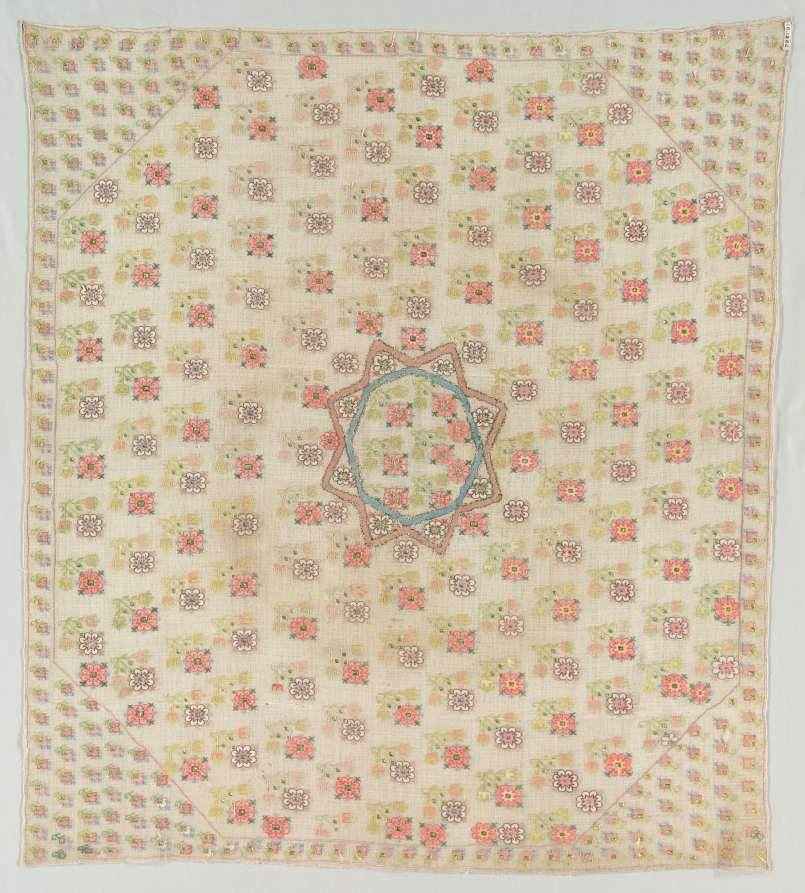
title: Embroidered Square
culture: Turkey, 19th century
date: 19th century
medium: embroidery: silk on linen tabby ground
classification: Embroidery